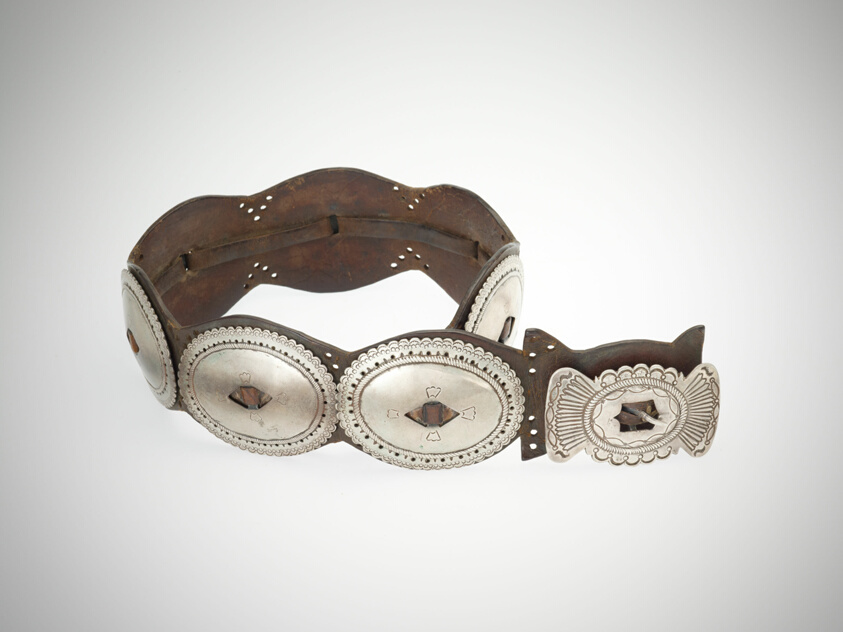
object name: Costume and Accessories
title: Concho Belt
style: navajo, dine, americas, native american, native north american, Arts of the Americas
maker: Navajo (Diné) (Northern New Mexico or Arizona, United States)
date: 1880–95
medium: Silver and leather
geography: Arizona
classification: belts (costume accessory); art of the americas; costume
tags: jewelry, geometric, silver (color), status